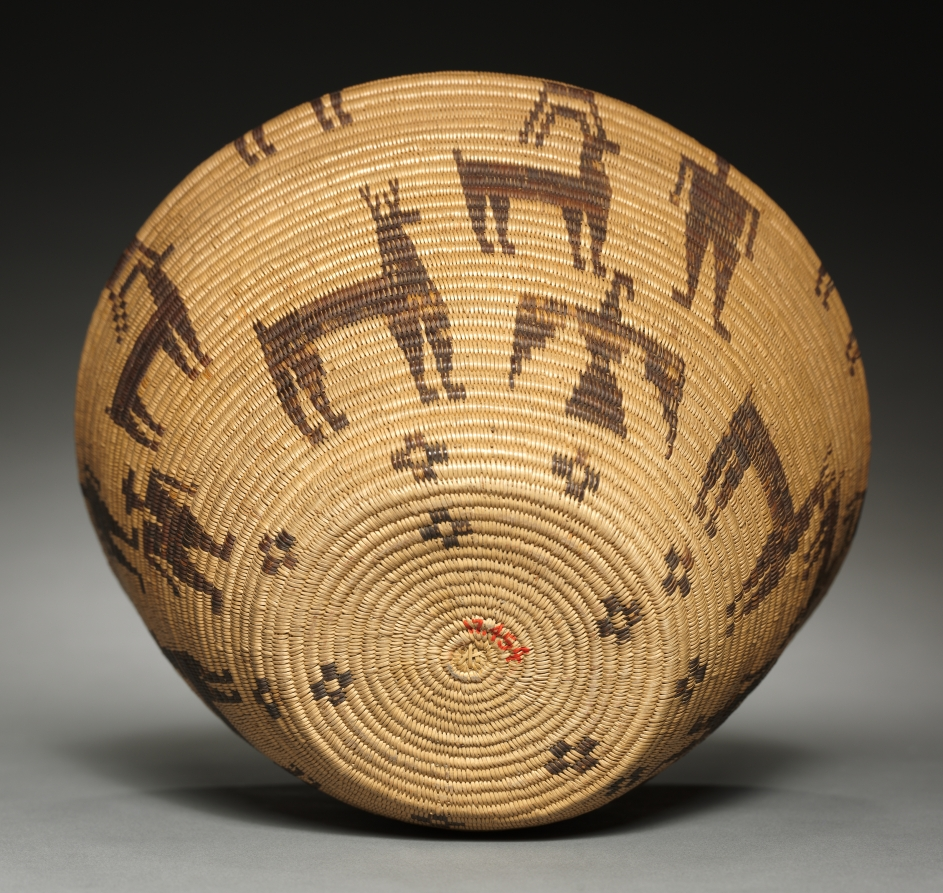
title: Jar-shaped Basket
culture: Native North America, Great Basin, California, Death Valley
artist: Sarah Hunter (Timbisha Shoshone (Panamint), 1883–1967)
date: 1910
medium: Willow, bulrush; coiled (3 rods)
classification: Basketry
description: Sarah Hunter’s basketry is noted for geometricized motifs reminiscent of the animals depicted in petroglyphs on canyon walls in the Death Valley region. Here they include pronghorn mountain sheep, deer, and birds, along with humans, all created in light-brown bulrush against a honey-colored willow ground. Traditional Indigenous basket weavers, who have exhaustive knowledge of the plant world, tend, harvest, and prepare their own materials. If stages of the process are not done properly and at the right time, color will be uneven and stitches will twist and split.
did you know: Some Timbisha Shoshone women continue traditions of basket weaving to the present day.